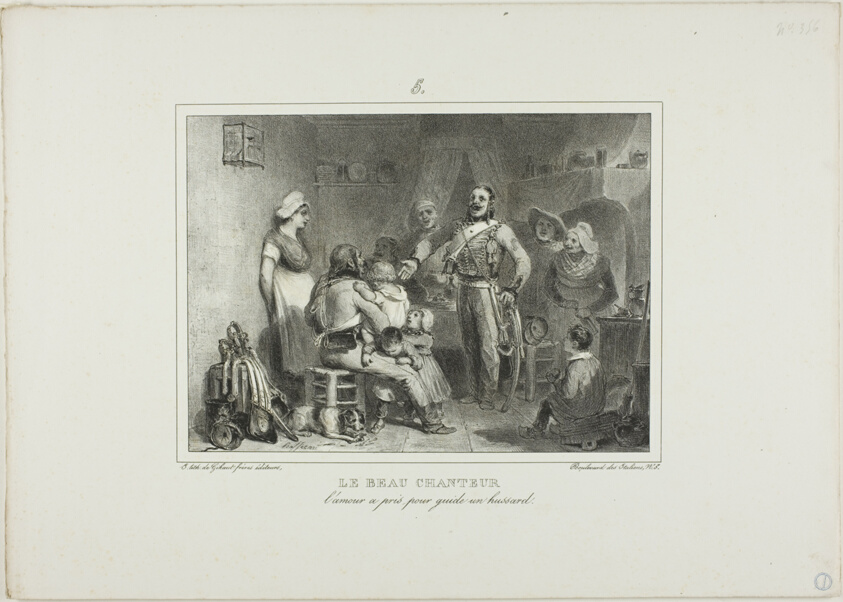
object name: Print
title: The Best Singer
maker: Denis Auguste Marie Raffet (French, 1804-1860); printed by Chez Gihaut Frères (French, 19th century)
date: 1831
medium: Lithograph in black on ivory wove paper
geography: France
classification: lithograph; print; prints and drawing